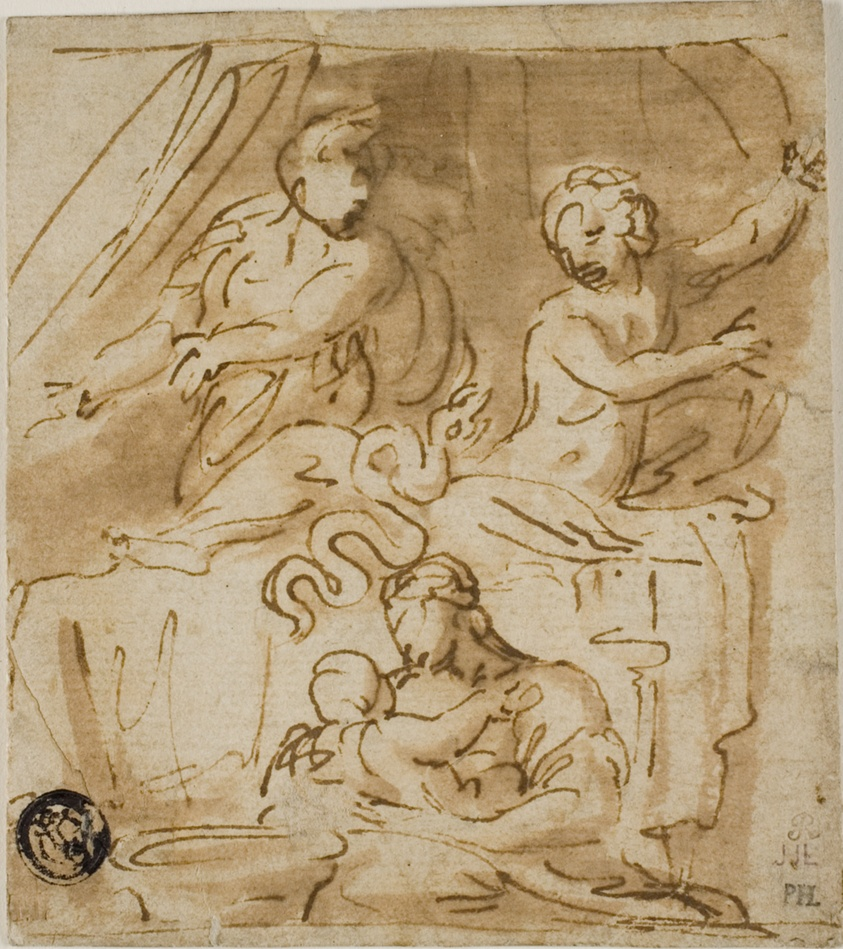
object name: Drawing and Watercolor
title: Birth of Alexander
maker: After Polidoro Caldara, called Polidoro da Caravaggio; Italian, c. 1499-c. 1543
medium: Pen and brown ink, with brush and brown wash, on ivory laid paper, laid down on tan wove paper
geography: Italy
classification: ink with wash; drawings (visual works); prints and drawing